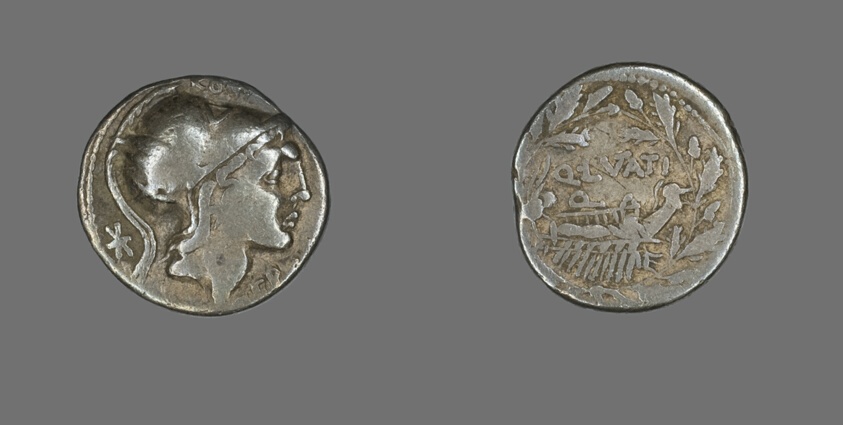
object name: Coin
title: Denarius (Coin) Depicting the Goddess Roma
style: roman (ancient, style or period)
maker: Roman, minted in Rome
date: 109-108 BCE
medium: Silver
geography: Italy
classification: coin; ancient art